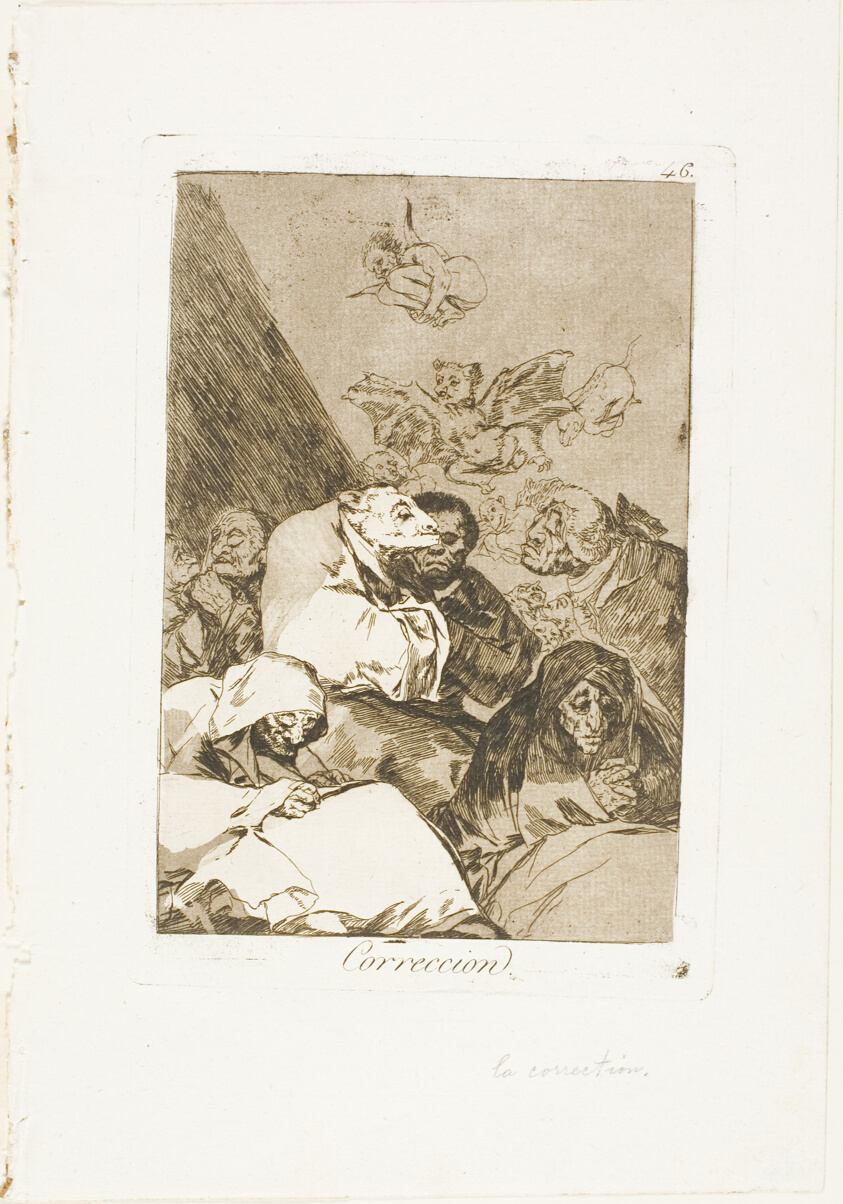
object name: Print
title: Correction, plate 46 from Los Caprichos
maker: Francisco José de Goya y Lucientes (Spanish, 1746-1828)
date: 1797/99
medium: Etching and aquatint on ivory laid paper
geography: Spain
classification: etching; print; prints and drawing